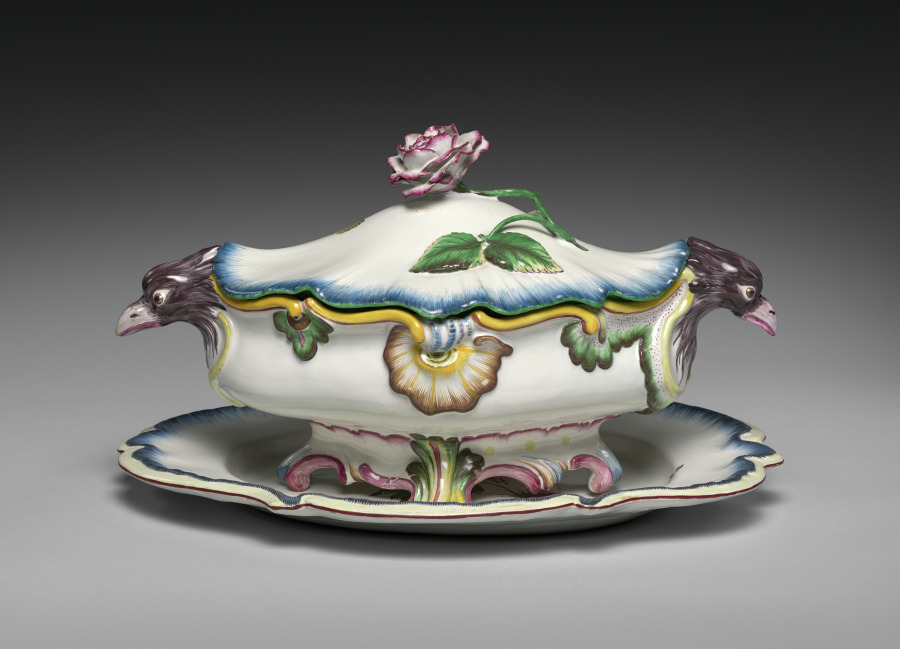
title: Covered Tureen on Stand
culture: France, Strasbourg, 18th century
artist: Strasbourg Factory (France)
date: c. 1750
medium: tin-glazed earthenware (faience) with enamel decoration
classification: Ceramic